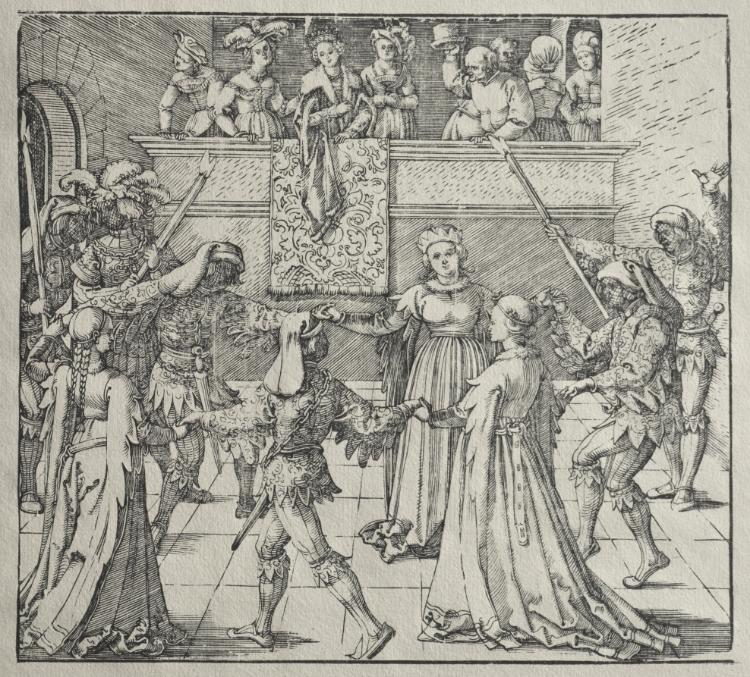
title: The Masquerade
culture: Germany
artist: attributed to Albrecht Dürer (German, 1471–1528)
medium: woodcut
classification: Print